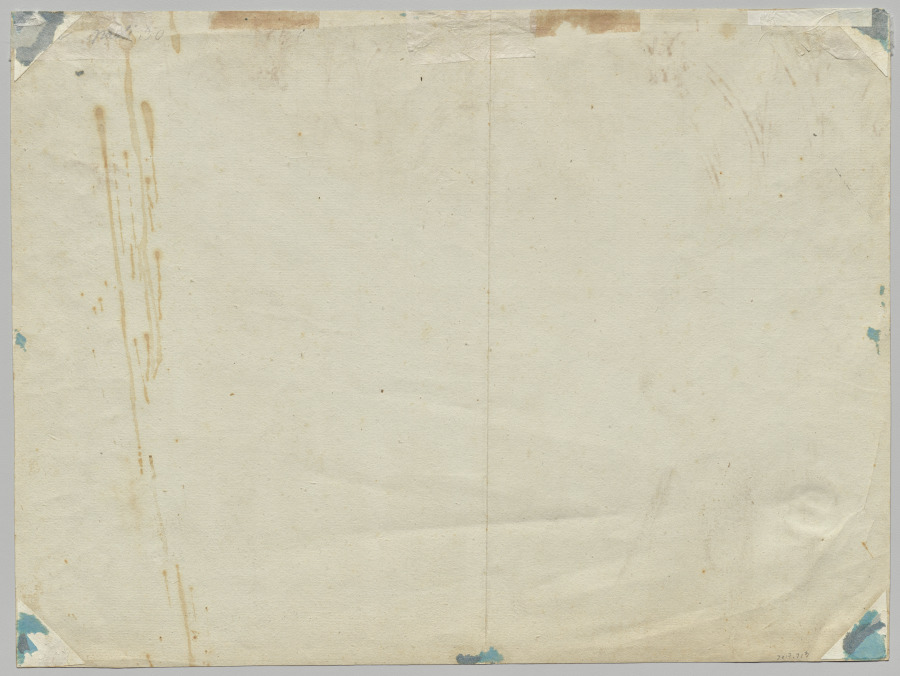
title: A Christening in Revolutionary France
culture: France, 19th century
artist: Jean-Baptiste Mallet (French, 1759–1835)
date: late 18th century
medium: Pen and brown and gray inks and red chalk and watercolor, heightened with white; squaring for transfer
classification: Drawing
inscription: verso, upper left corner, in graphite: paoli 30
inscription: lower left corner, label pasted down on sheet: VALLEE, Md. D'Estampes,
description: Mallet’s image depicts a Republican baptism ceremony during the French Revolution. The event takes place in a magnificent Gothic church, identifiable as such by its pointed arches and stained glass window. A mother presents her infant to the priest who raises his right hand as he administers the sacrament. Even the musicians pause from playing to watch this spectacle.